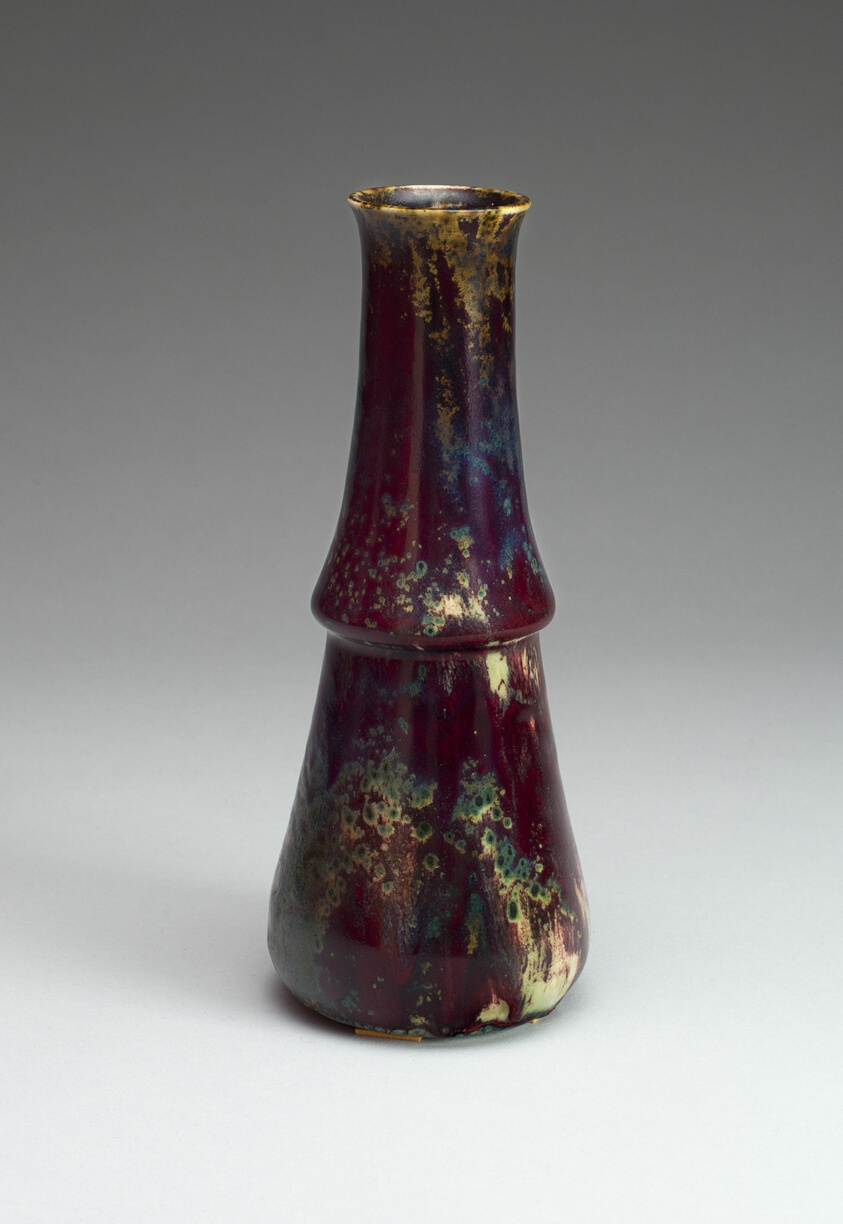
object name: Ceramics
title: Vase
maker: Pierre Adrien Dalpayrat; French, 1844-1910; Bourg-la-Reine, France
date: c. 1900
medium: Glazed stoneware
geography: France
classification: vase; vessel; ceramics